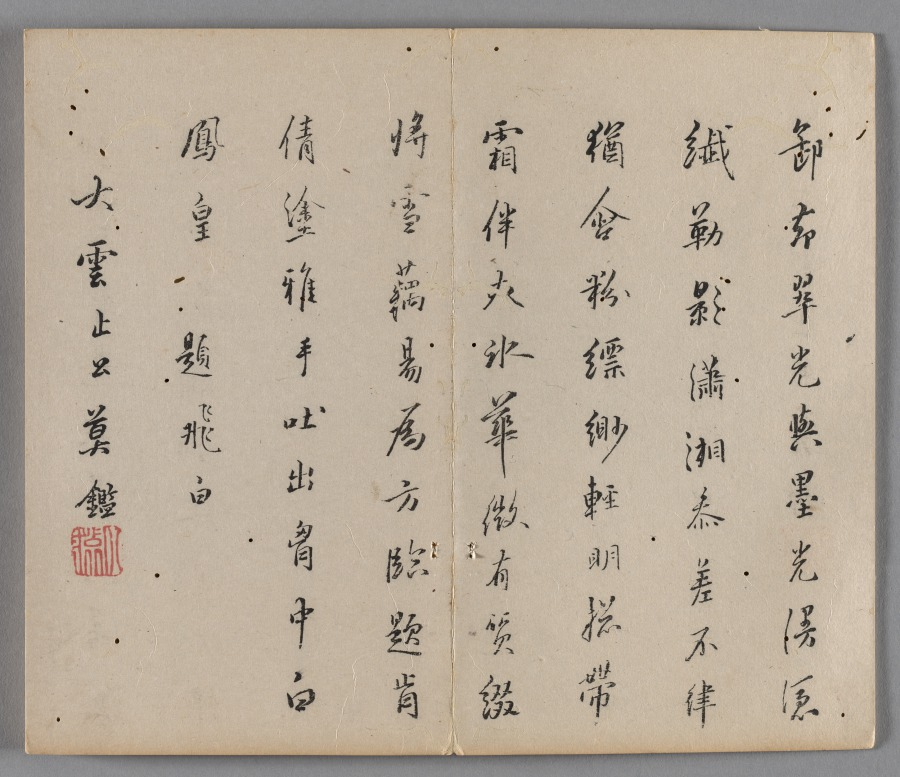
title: Ten Bamboo Studio Painting and Calligraphy Handbook (Shizhuzhai shuhua pu): Bamboo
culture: China, Qing dynasty (1644-1911)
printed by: Hu Zhengyan (Chinese, c. 1584–1674)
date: 1633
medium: Woodblock-printed book; ink and colors on paper; first edition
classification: Print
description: Color printing reached a level of perfection in the early 1600s, as seen in this Ten Bamboo Studio Collection of Calligraphy and Painting and the Mustard Seed Garden Manual of Painting (printed 1679 and 1701). The painterly quality, precision in registering (aligning) the woodblocks, and harmonious colors made them the most successful color print editions in Chinese history. Both editions were printed and compiled in Nanjing, spread nationwide, and had a great impact on the arts in Japan and Korea.